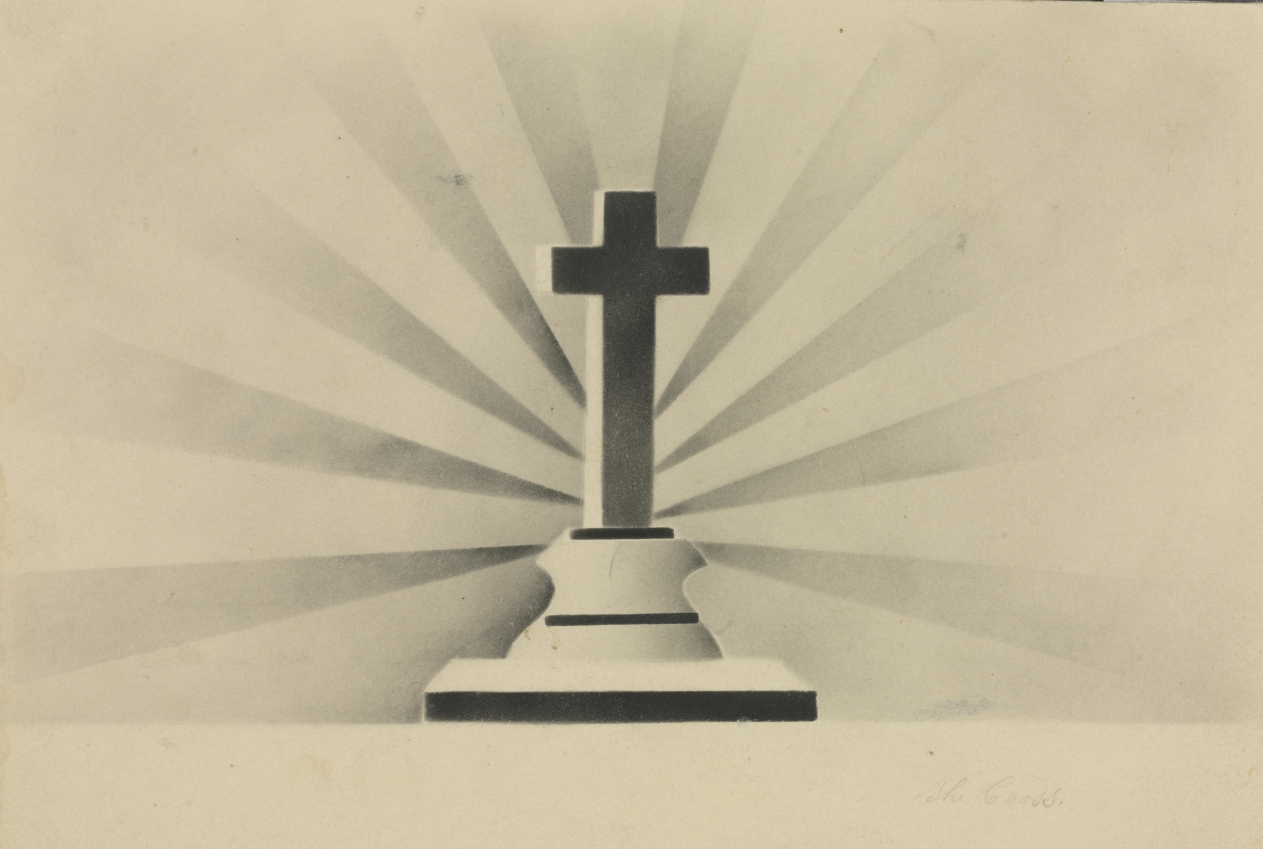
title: The Cross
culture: America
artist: Mary Altha Nims (American, 1817–1907)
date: 1800s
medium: pencil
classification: Drawing